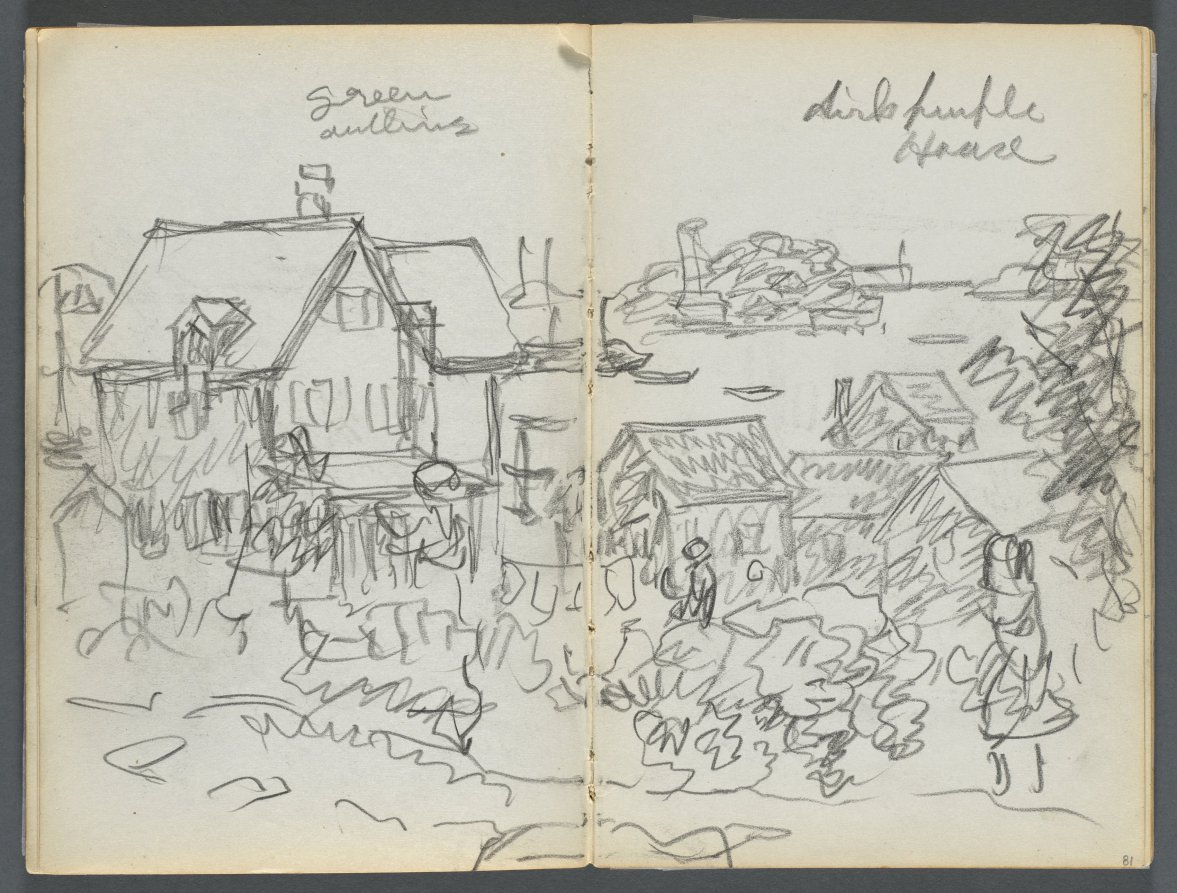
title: Sketchbook, The Dells, N° 127, page 080 & 81: Houses on a Coast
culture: America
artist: Maurice Prendergast (American, born Newfoundland [now Canada], 1858–1924)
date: c. 1919–1921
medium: graphite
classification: Bound Volume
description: This sketchbook contains 59 pages of graphite drawings and 16 watercolors made at various locations on Cape Ann, Massachusetts.